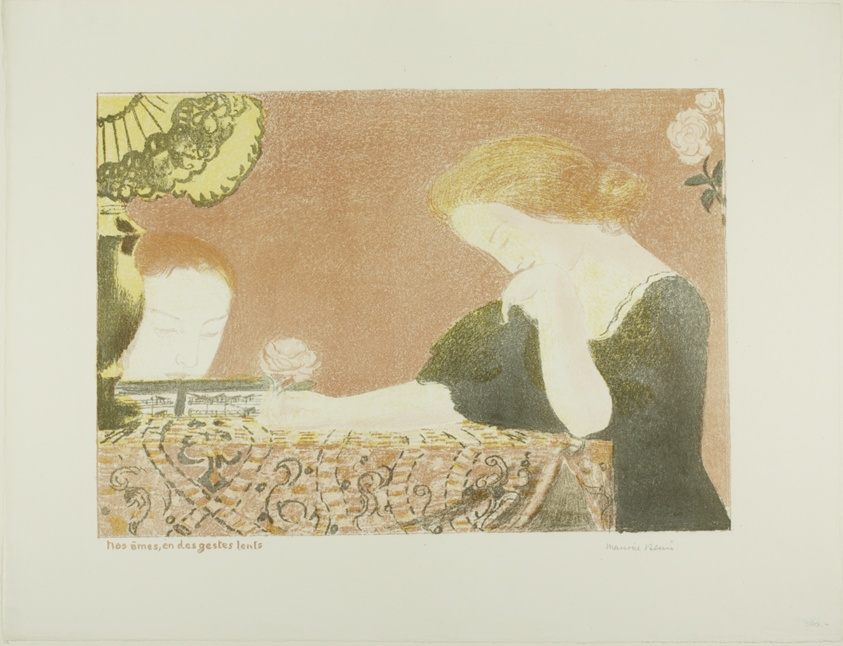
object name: Print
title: Our Souls, in Languorous Gestures, plate nine from Love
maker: Maurice Denis (French, 1870-1943); published by Ambroise Vollard (French, 1867-1939)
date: 1898, published 1899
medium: Lithograph in pale pink, slate gray, red-brown, and yellow on light ivory wove paper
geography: France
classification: lithograph; print; prints and drawing